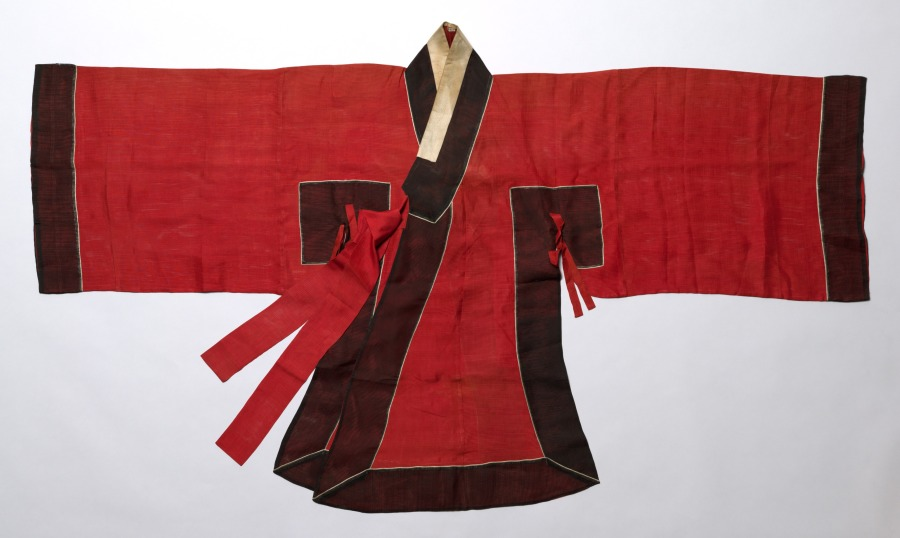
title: Overcoat for the Royal Ceremonial Costume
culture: Korea, Joseon dynasty (1392–1910)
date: late 1800s–early 1900s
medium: silk: dyed red, black, and white; gauze weave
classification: Garment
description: This is a set of royal ceremonial robe and accessories worn by a high-ranking court official for attending special state ceremonies. The set consists of an inner coat, an outer coat, a skirt, a back apron, a crown, a pair of jade tassels, a tablet, and a belt.